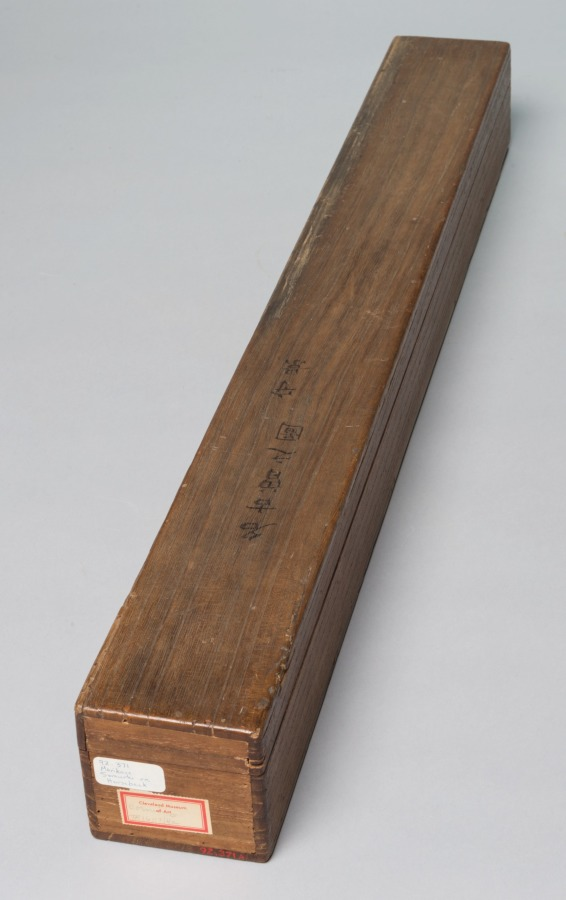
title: A Samurai on Horseback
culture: Japan, Edo period (1615–1868)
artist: Kusumi Morikage (Japanese, active c. 1620–1690)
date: mid- to late 1600s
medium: hanging scroll; ink and slight color on paper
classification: Painting